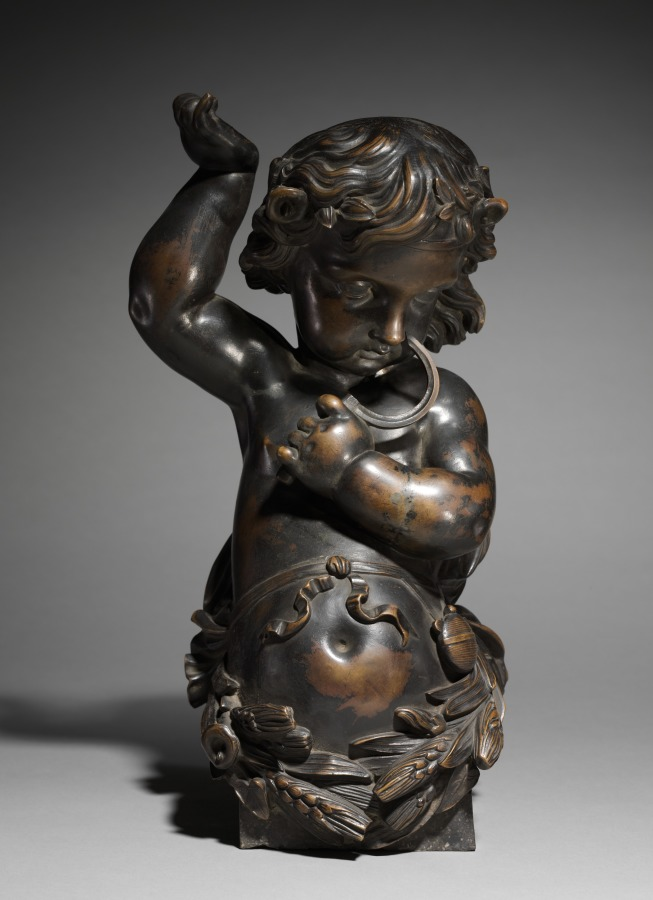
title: Pair of Bronze Statues: Autumn and Winter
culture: France, 19th century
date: 1800s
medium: bronze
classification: Sculpture